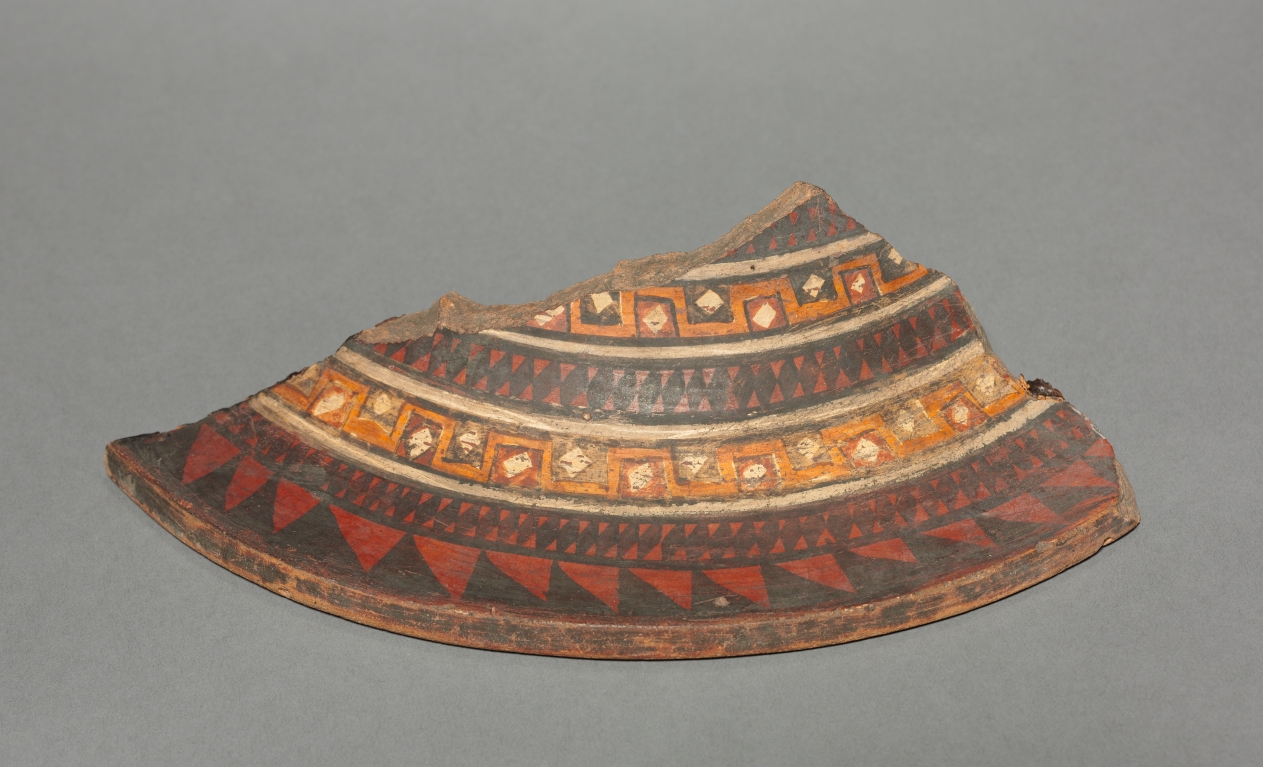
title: Jar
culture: Colombia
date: before 1550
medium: pottery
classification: Ceramic